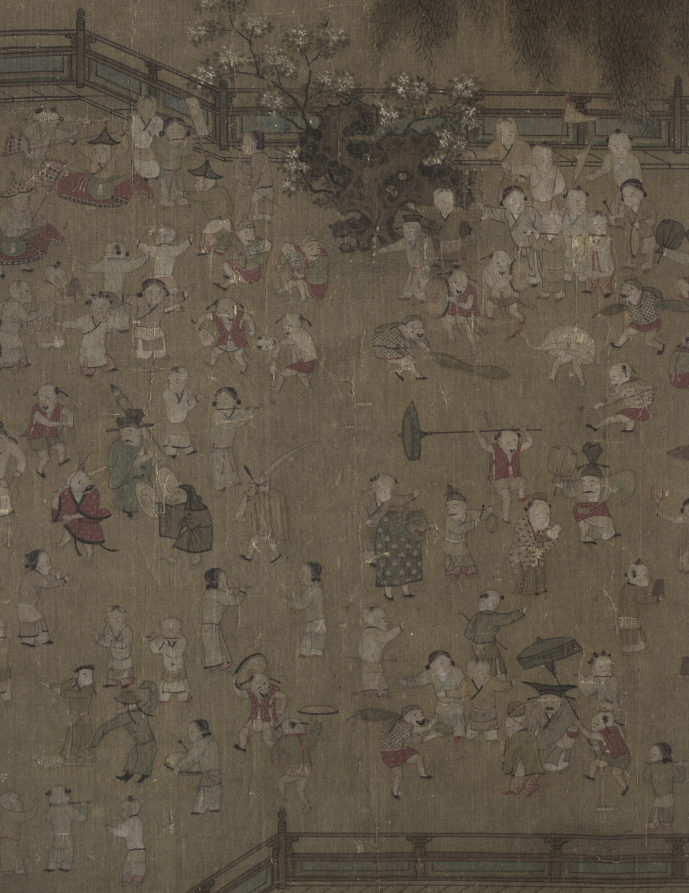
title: One Hundred Children at Play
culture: China, Southern Song dynasty (1127-1279)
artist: tradition of Su Hanchen (Chinese, active c. 1101–1125)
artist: tradition of Wang Juzhen (Chinese)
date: 1100s–1200s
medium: Album leaf; ink and color on silk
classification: Painting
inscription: 2 seals unidentified: one lower right and one top center.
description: Paintings on the “one hundred children” theme usually have numerous, if not exactly 100, children. A majority of the children here imitate the dress, manners, and activities of the adult world. Whatever the exact significance of the subject, the painter of this album leaf clearly intended it to be savored figure by figure. With seemingly inexhaustible invention, the artist characterized each performer in the colorful pageant with unique accoutrements and action. The avoidance of overlapping allows each figure to be seen in clear detail, while all the figures are organized into a coherent composition. Garden settings with decorative rocks, blossoming shrubs, graceful willows, and lotus ponds had become fairly standard environments for late 12th- to 13th-century scenes of palace ladies as well as of playing children.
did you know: Following a baby’s birth, ceremonies and festivities traditionally marked the baby’s successive attainment of thirty days, one hundred days, and one year in age. “One hundred children” paintings such as this album leaf would have been suitable for presentation on either of the latter occasions.